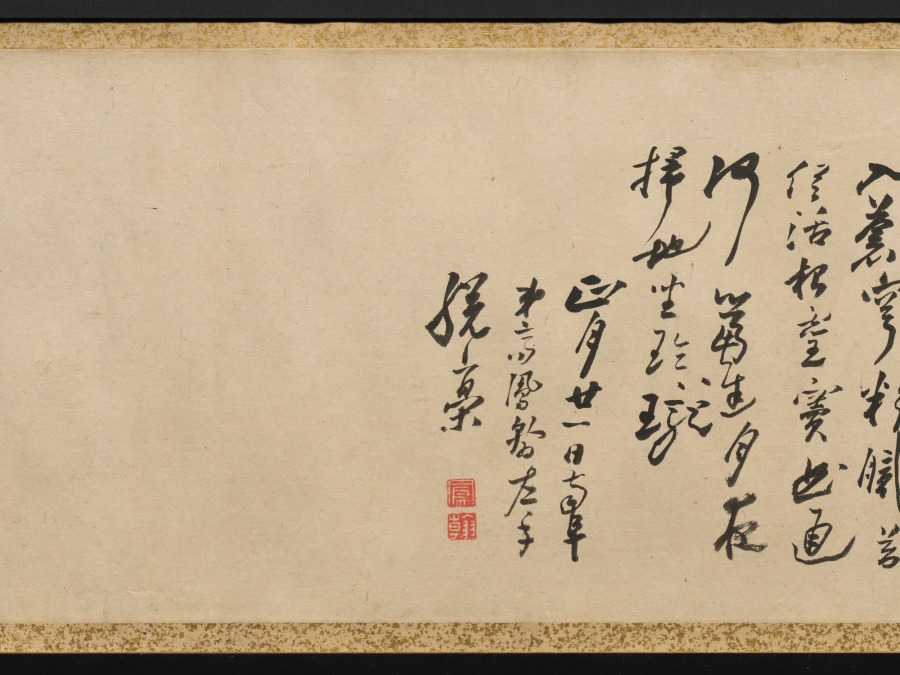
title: Plum Blossoms and Peonies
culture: China, Qing dynasty (1644-1911)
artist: Gao Fenghan (Chinese, 1683–1749)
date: 1741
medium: handscroll, ink on paper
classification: Painting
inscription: Artist's 2 inscriptions and 9 seals (the painting of Peonies with the artist's colophon and the colophon by Hou Chia-fan are on a single sheet of paper). Artist's inscription and 2 seals (Plum Blossoms): [seal] Ts'ai-yün. After finishing writing my colophon, I unrolled the painting to take another look, and it now seems that the composition here should have moved to the later part of the scroll. If that is the case, then the "Cool Beauty" [prunus] of the Solitary Hill is after all unable to take precedence over the "King of Flowers" [peony]. A laugh. Lao-fou inscribed. [seal] Feng-han. Artist's colophon (Plum Blossoms): [3 seals] Tun; Yen-yün-kung-yang, Hou-shang-tso-sheng. A few days after I painted this scroll for Shui- hsien [Yüeh Meng-yüan], the plum blossoms were in full bloom at his residence. He invited me over to enjoy them together for a long while, and I composed two additional poems and wrote them down here for his criticism. [Poems on the colophon are not translated.] First month, twenty-first day, your junior, Kao Feng-han of Nan-fou drafted this with the left hand. [seal] Feng-han. Artist's inscription and 4 seals (Peonies): Brushed with the left hand in the hsin-yu year [1741]. [seal] Yu-hsi. [3 seals at end of painting] Hou-shang-tso-sheng; Yen-yün-kung-yang; Shih-tsao-wu. Artist's colophon and seal (Peonies): The imperial concubine from the Yang family loved to dress in red, And from the emperor won the title of Hai-t'ang. But ever since she became the new dream of the moon palace, She changed into rainbow colors, while learning to dance. After I wrote the poem on Looking for Plum Blossoms in the Teng-wei Mountains, I attached to it a few branches of prunus, some bamboo tips and a piece of rock, with a scattering of green [moss] here and there to fill up the scroll. Unexpectedly, my playful fascination [with these subjects] was still not quite satisfied, so I made up these amorous ideas and romantic images [of the peony], to follow the footsteps of the fair lady of the Ku-hsieh Mountain [prunus]. Furthermore, I picked out one poem to be my vanguard. Perhaps such luminosity of wealth and power will be enough to overwhelm the poor fellows, and [they] will not mind the comparatively short length [of paper] assigned to it. Amusingly inscribed. Please correct me again. To Shui-hsien, my learned senior, your junior Han inscribed again. [seal] Tso-hua [left-handed painting]. 1 additional colophon and 5 additional seals: 1 colophon, dated 1742, and 3 seals of Hou Chia-fan (act. ca. 1742); 1 seal of P'u Ch'üan (20th c.?); 1 seal of Li family (dates unknown).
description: One of the so-called Yangzhou Eccentrics (a group of painters who lived in Yangzhou and were known for their unorthodox art and lifestyle), Gao Fenghan depicts China’s two most loved flowers in full bloom—the “cold beauty,” or plum blossom, in the first section, and the “king of flowers,” or peony, in the second section. Painted in 1741, the year when Gao decided to leave the south and return home to Shandong province in eastern China, this work was likely a token of farewell. His casual brushwork may indicate his mental and physical struggle at the time. After having crippled his right hand in 1737, Gao used his left hand to paint and achieved a crudeness and eccentric style unattainable before.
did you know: In East Asian art, peonies traditionally symbolize prosperity and wealth.